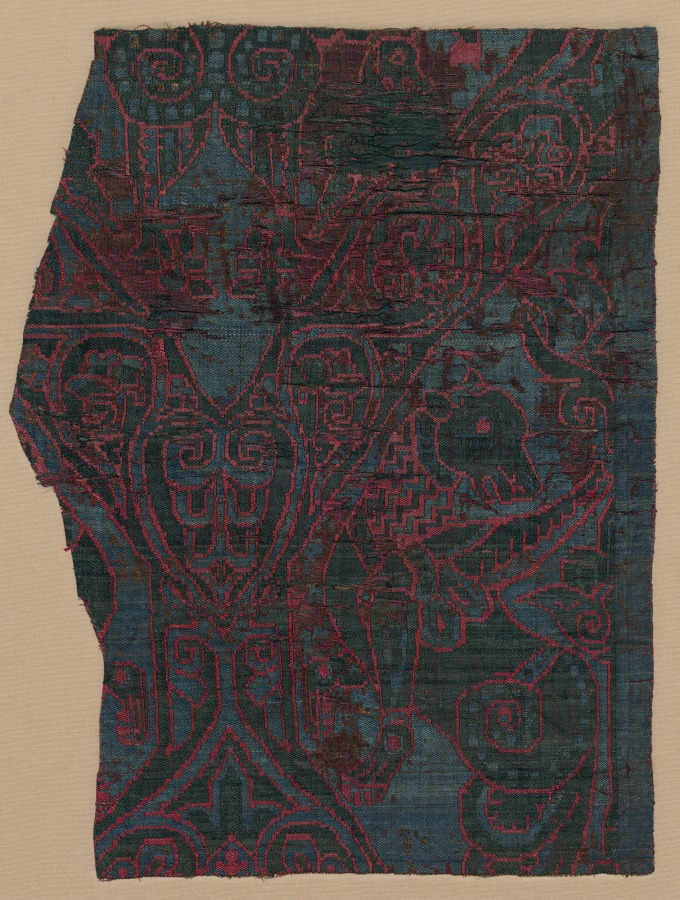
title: Basilisk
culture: Byzantium, Byzantine period, 12th century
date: 1100s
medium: compound twill weave, silk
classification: Textile